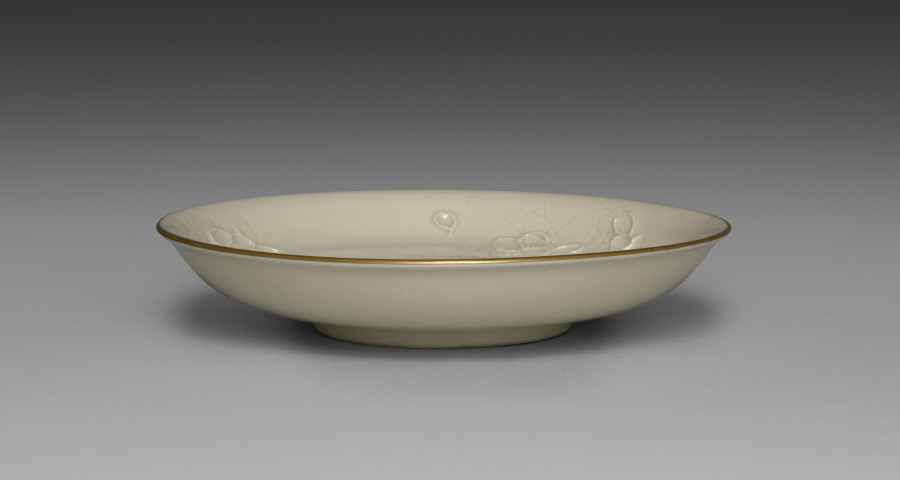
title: Medium-sized Dish from Dining Set with Plum Blossoms and Cracked-Ice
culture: Japan, Meiji period (1868–1912)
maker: Seifū Yohei II (Japanese, 1844–1878)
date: c. 1875–78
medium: Porcelain with molded designs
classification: Ceramic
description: Each item in this set has a delicate low-relief design of flowering plum branches over scattered, intersecting lines meant to resemble the cracked-ice surface of a frozen body of water and is signed on the base in gold pigment. While Yohei II produced many fine works in underglaze blue, like those produced by Kiyomizu Shichibei, he also made works in quite different styles later in his career, from the early 1870 s. In 1873, he was appointed purveyor to the Industrial Center of Kyoto Prefecture, a designation associated with Kyoto’s efforts to reach an international market through the port of Kobe; and from 1875 until his death, he was involved in national-level projects to present Japanese ceramics across the world. It was during this period that Yohei III was apprenticed to Yohei II, and it has been suggested that this set may in fact be an early example of Yohei III’s work, which he signed with his teacher’s name. Decorated with flowers resembling Japanese textile motifs, the set calls to mind the design of Yohei II’s pair of vases with plum blossoms in the Victoria and Albert Museum. Here, the elaborate trees created for a formal public exhibition setting have been translated into the approachable blossoms of the genteel domestic environment. While the designs are consistent across the pieces, each raised flower petal and pistil and each incised line in the ice was done by hand, so the cups, bowls, and dishes are similar yet unique. The bottoms of two boxes once identified the set’s owner, but the information has been deliberately obscured with black ink. However, inscriptions still visible appear to indicate two occasions, once at the end of July 1886 , and once again in June 1916 , when parts of the set were requested from Hokura in Niigata Prefecture. The location corresponds to a neighborhood in the present-day city of Jōetsu. The surname Tsuji 辻 also appears on a paper tag affixed to one of the box cloths. Future research may possibly reveal more about their provenance. A vase by Yohei III in a private collection combines the formal grandeur of the Yohei II vases in the Victoria and Albert Museum with the gentler design of this dining set, placing flowering plum trees against soft, scalloped-edge clouds resembling those in golden screens.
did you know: The dining wares have a creamy white coloration that the four boxes containing them identify as Korean in style.